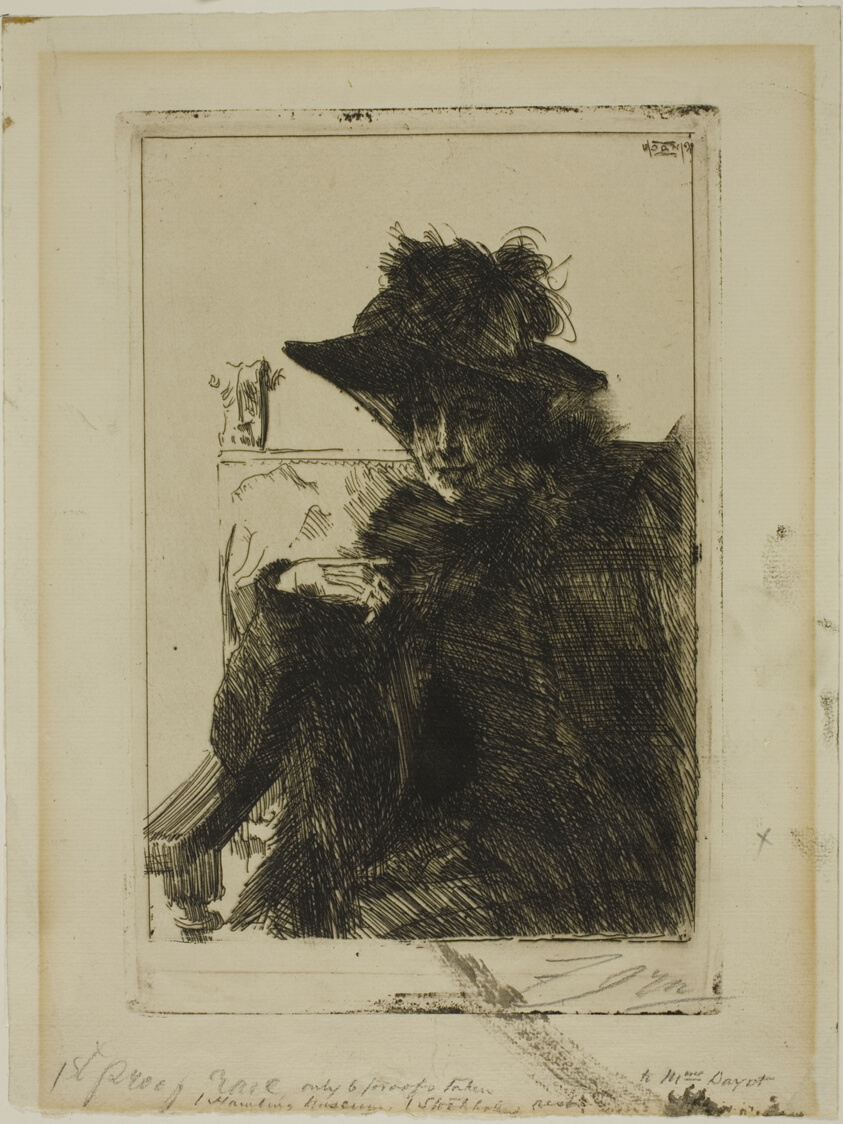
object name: Print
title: Mme Armand Dayot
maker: Anders Zorn (Swedish, 1860-1920)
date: 1890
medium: Etching on ivory laid paper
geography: Sweden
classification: etching; print; prints and drawing